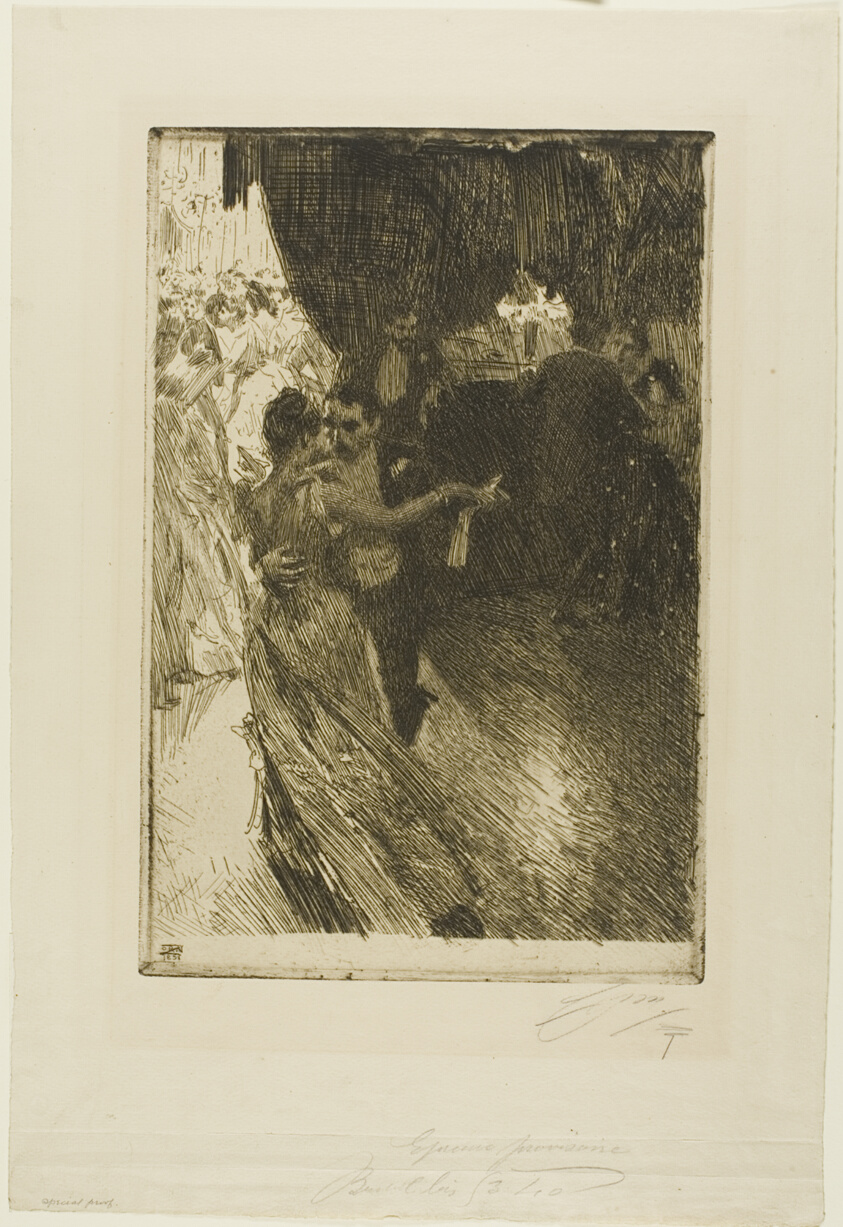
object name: Print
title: The Waltz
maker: Anders Zorn (Swedish, 1860-1920)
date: 1891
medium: Etching on ivory laid paper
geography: Sweden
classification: etching; print; prints and drawing